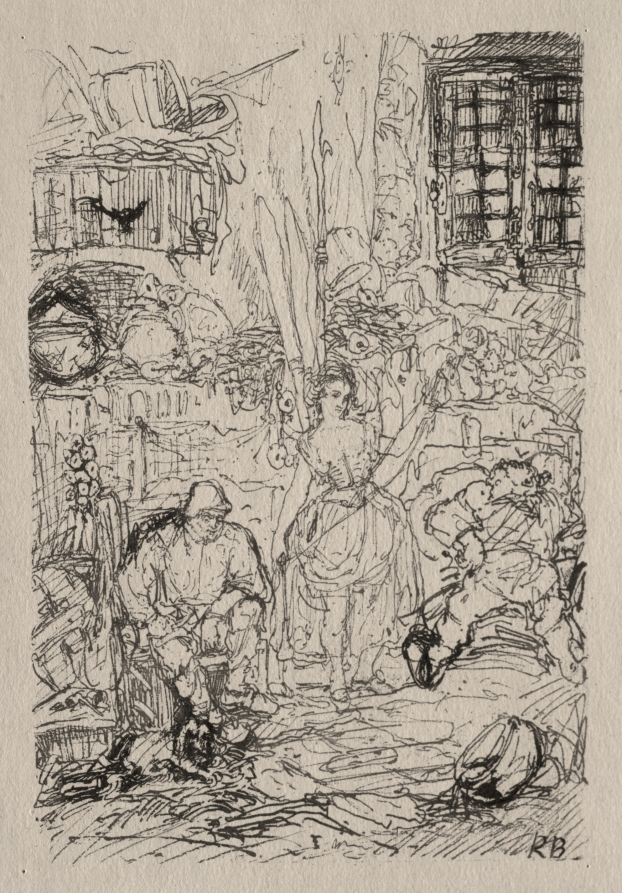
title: Spinner's Interior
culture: France, 19th century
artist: Rodolphe Bresdin (French, 1822–1885)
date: mid–late 1800s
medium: cliché-verre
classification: Print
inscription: signed, lower right, in plate: RB